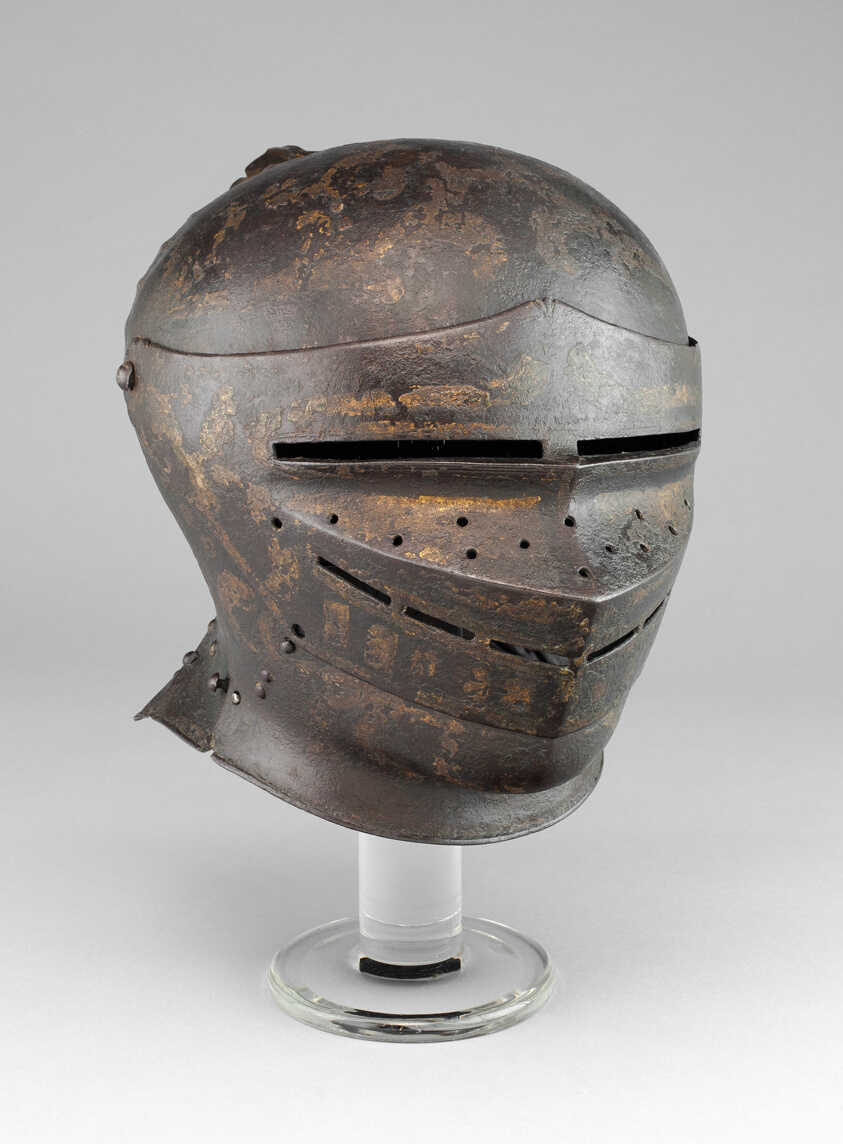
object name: Armor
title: Close Helmet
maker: German or Austrian (possibly Innsbruck)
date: c. 1510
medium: Steel and paint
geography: Innsbruck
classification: suit-helmet; armor; arms and armor